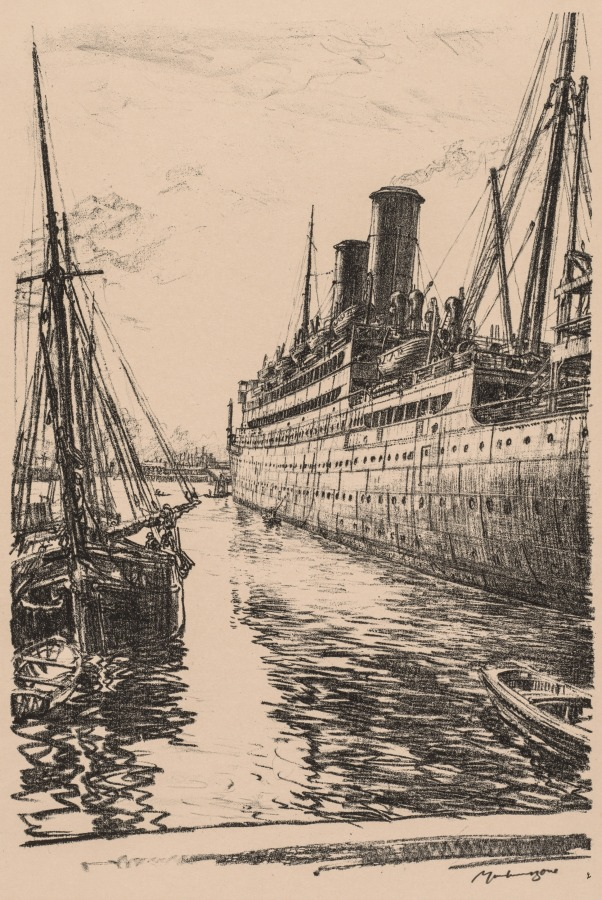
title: On the Clyde, 1917-1918: The Tuscania at Glasgow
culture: England, 20th century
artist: Muirhead Bone (British, 1876–1953)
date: 1917–1918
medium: lithograph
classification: Print